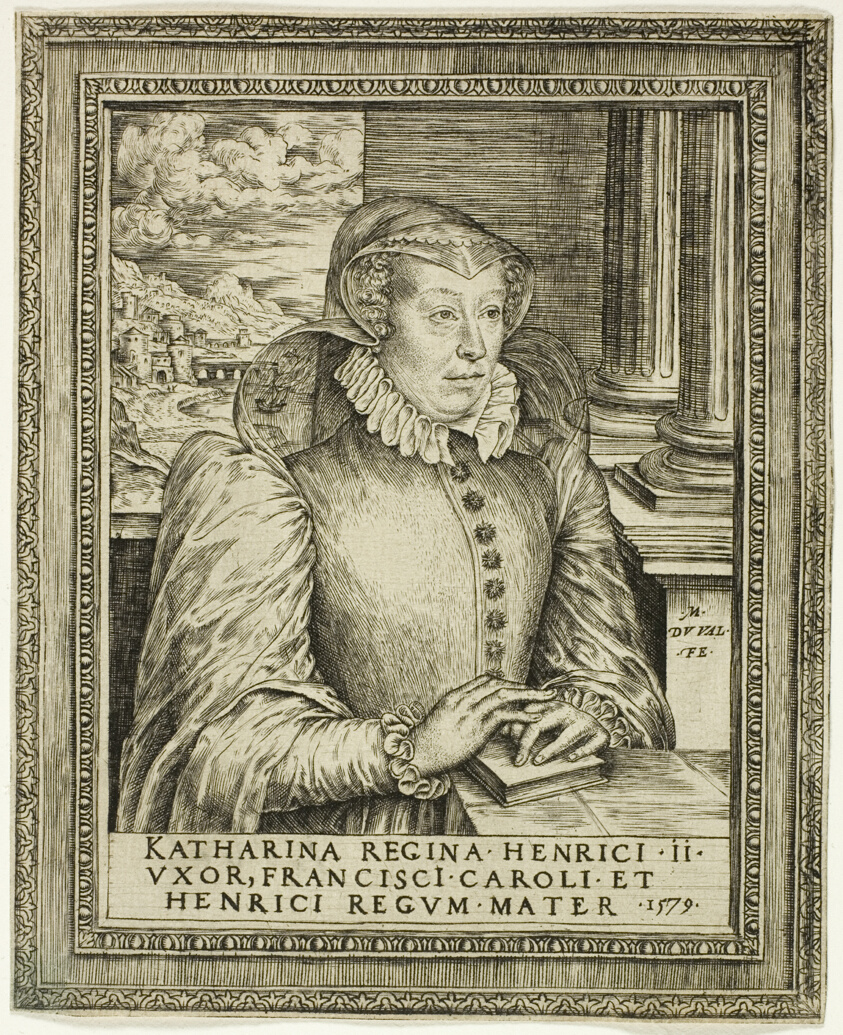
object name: Print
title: Catherine de'Medici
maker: Marc Duval (French, c. 1530-1581)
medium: Engraving on ivory laid paper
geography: France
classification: engraving; print; prints and drawing